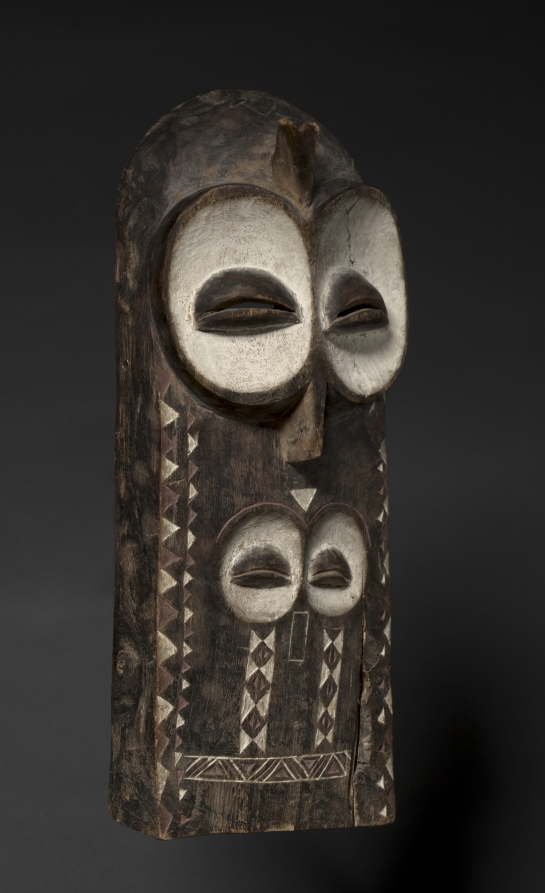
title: Mask (Emangungu)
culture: Africa, Central Africa, Democratic Republic of Congo, Bembe-style maker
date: possibly early 1900s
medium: Wood, kaolin, colorant, and iron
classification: Mask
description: Among the Bembe, anthropo-zoomorphic plank masks are used in circumcision rites called butende. They are worn along with a costume of bark and banana leaves by the initiated boys who beg for food in the village while living in seclusion in the forest. The sculpture’s short projections above the forehead are identified as an owl’s tufts. The two pairs of eyes could refer to divination.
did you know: White kaolin clay highlights the eyes of this carved wooden mask.